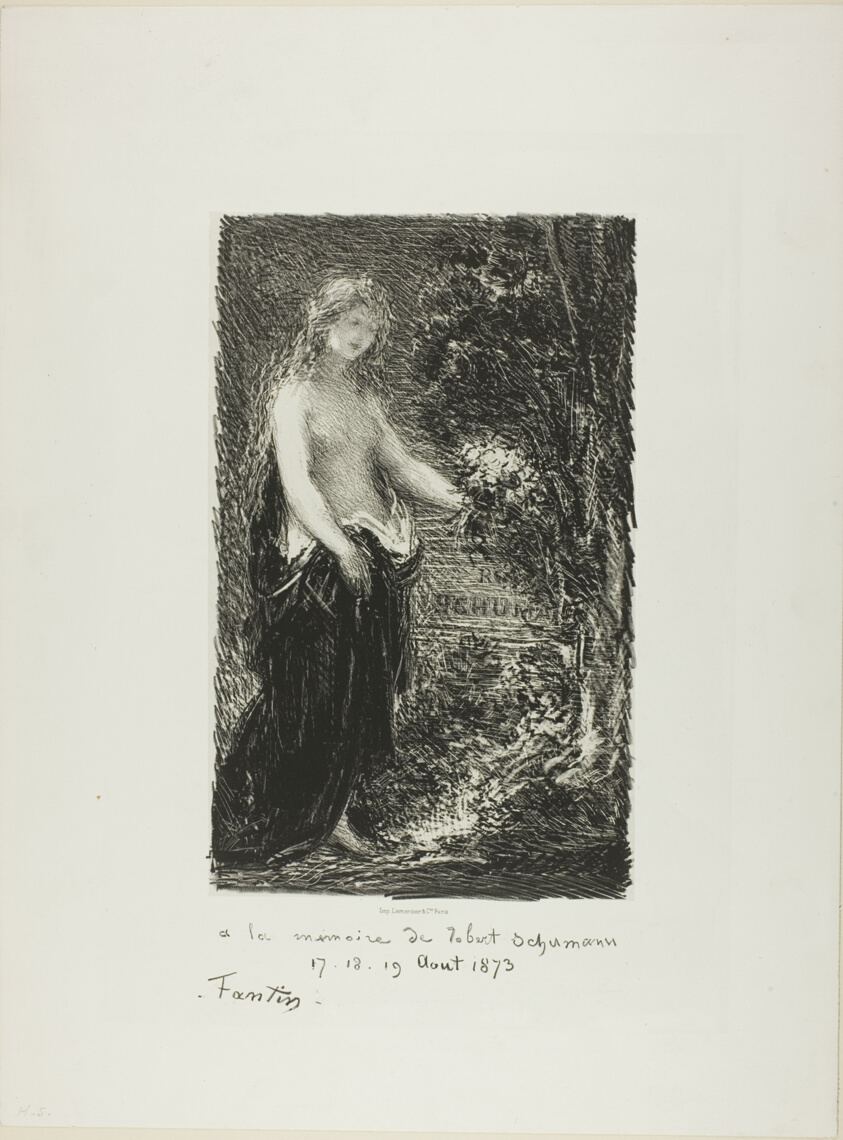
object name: Print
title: In Memory of Robert Schumann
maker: Henri Fantin-Latour (French, 1836-1904)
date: 1873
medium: Lithograph in black on off-white China paper laid down on white wove paper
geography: France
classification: lithograph; print; prints and drawing